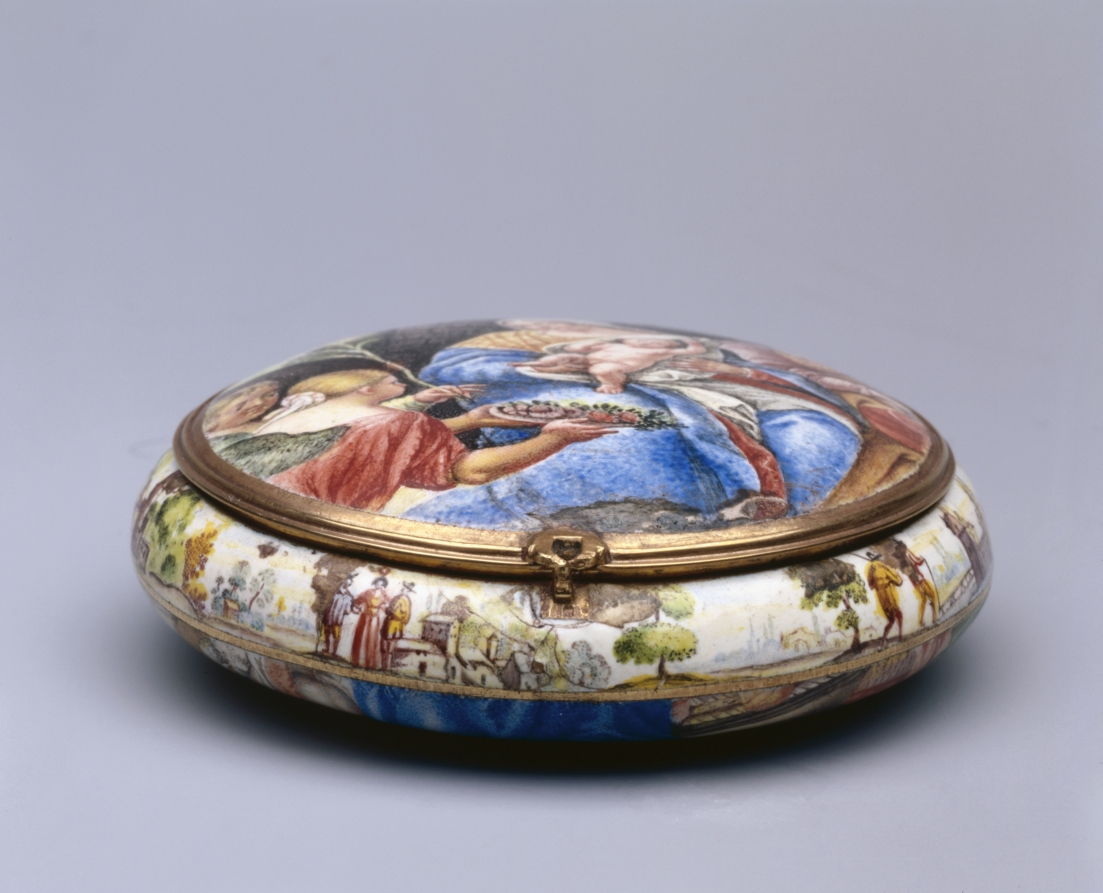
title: Watchcase (Boîtier de montre)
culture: France, 17th century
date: c. 1640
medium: gold and enamel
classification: Jewelry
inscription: [engraved on the rim]: "B8"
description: In the 1630s, the practice of painting with enamel on metal became a means for French miniature painters to achieve a more richly colored, durable product. Previously miniatures were painted with watercolor on vellum, a material made from animal skin. This case would have originally held a watch, but was later transformed into a simple box through the removal of the watch mechanism and ring. This watch case is richly painted inside and out with miniatures modeled after well-known religiously allegorical works.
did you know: Inspiration for the box’s miniatures was drawn from works by Peter Paul Rubens’ The Holy Family with Saints John the Baptist and Elizabeth (1615) (back panel) and Nicolas Cochin (interior base).